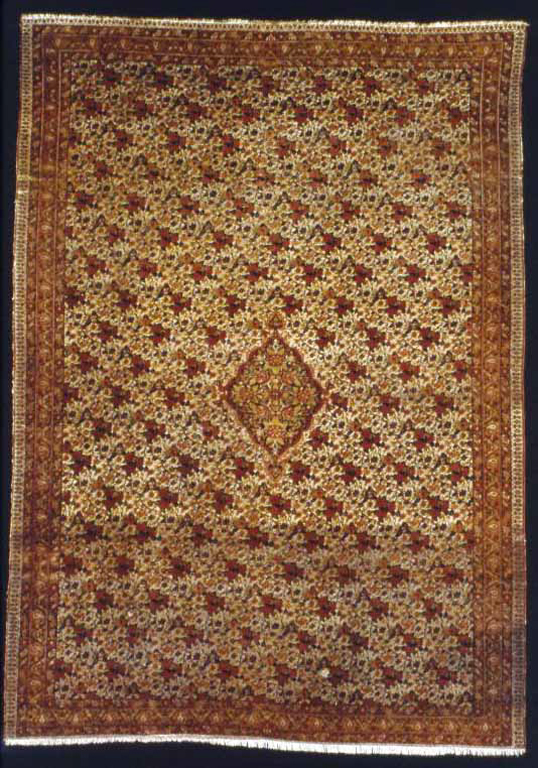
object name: Textile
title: Carpet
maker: Iran (Persia)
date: 1875/1900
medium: Cotton and wool, plain weave variation with supplementary wrapping wefts forming cut solid pile through a technique known as "Sehna knots"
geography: Iran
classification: textile; weaving - carpet